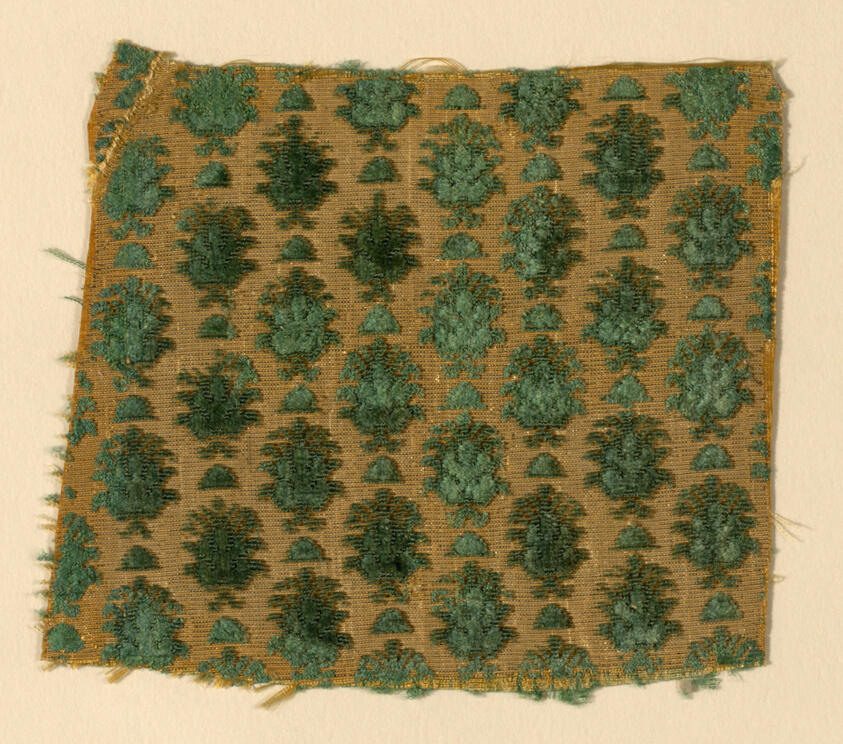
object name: Textile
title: Fragment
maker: Italy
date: c. 1600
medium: Silk, cut, uncut, and voided velvet with additional patterning wefts of gold foil against plain weave foundation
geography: Italy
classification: textile; weaving - velvet